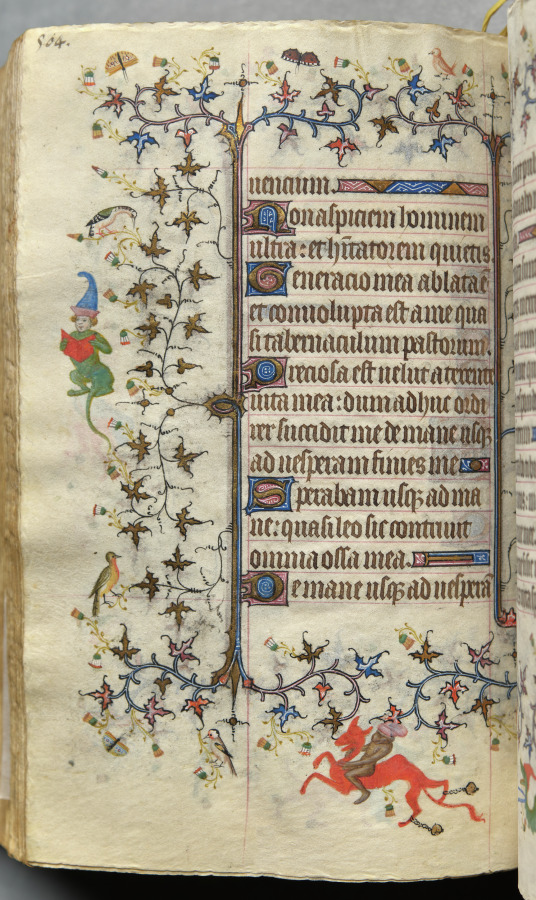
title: Hours of Charles the Noble, King of Navarre (1361-1425): fol. 246v, Text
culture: France, Paris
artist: Master of the Brussels Initials and Associates (French)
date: c. 1405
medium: ink, tempera, and gold on vellum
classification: Bound Volume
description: This precious volume was obviously highly prized by its owner, the French-born King of Navarre, who had his coat of arms painted on no less than twenty folios. Rather than directly commissioning this manuscript from a specific workshop, it seems that Charles the Noble acquired his book of hours -- perhaps ready-made for the luxury market -- while on a trip to Paris in 1404-05. A collaborative effort, six painting styles are evidenced within the pages of this codex, those of two Italians, two Frenchmen, and two Netherlanders. The painter who was responsible for the planning and decoration of the book, and who produced seventeen of the large miniatures, was a Bolognese artist known as the Master of the Brussels Initials. His principal assistant, responsible for most of the borders, was a Florentine who signed his name "Zecho" da Firenze on folio 208 verso.